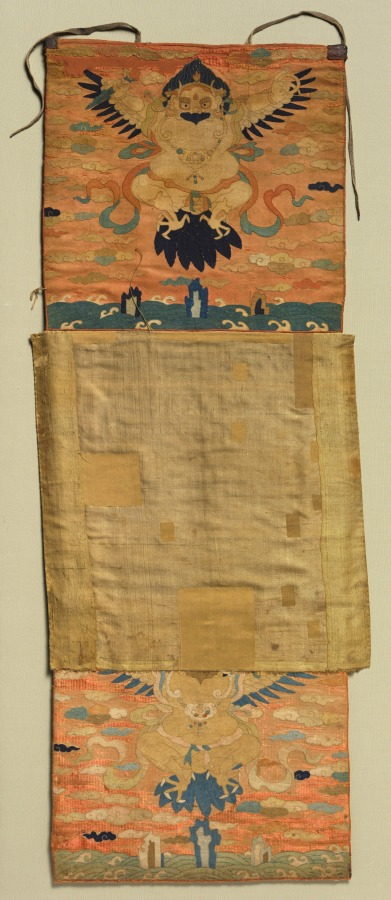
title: Vajrapani Embroidered Mount with Garuda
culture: China and Tibet, Embroidery: China, Yuan dynasty (1279–1368); painting: Tibet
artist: Choying Dorje, the Tenth Black Hat Karmapa (Tibetan, 1604–1674)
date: painting 1600s, embroidery c. 1300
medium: Opaque watercolor, gold, and silver on silk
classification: Embroidery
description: The painting depicts the Buddhist protector who holds (pani) the thunder bolt (vajra) in his right hand. He kneels in reverence and holds his left hand in a gesture of salute. This unusual image appears to have been the vision of a Tibetan monastic patriarch known for creating his own inventive paintings and sculptures. Sewn to the painting are Chinese damask borders and rare embroideries dating to the Chinese Yuan dynasty (1279–1368). They depict man-eagle figures known as Garuda, a form occasionally assumed by Vajrapani.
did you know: Vajrapani sometimes takes the form of Garuda, enemy of snakes.